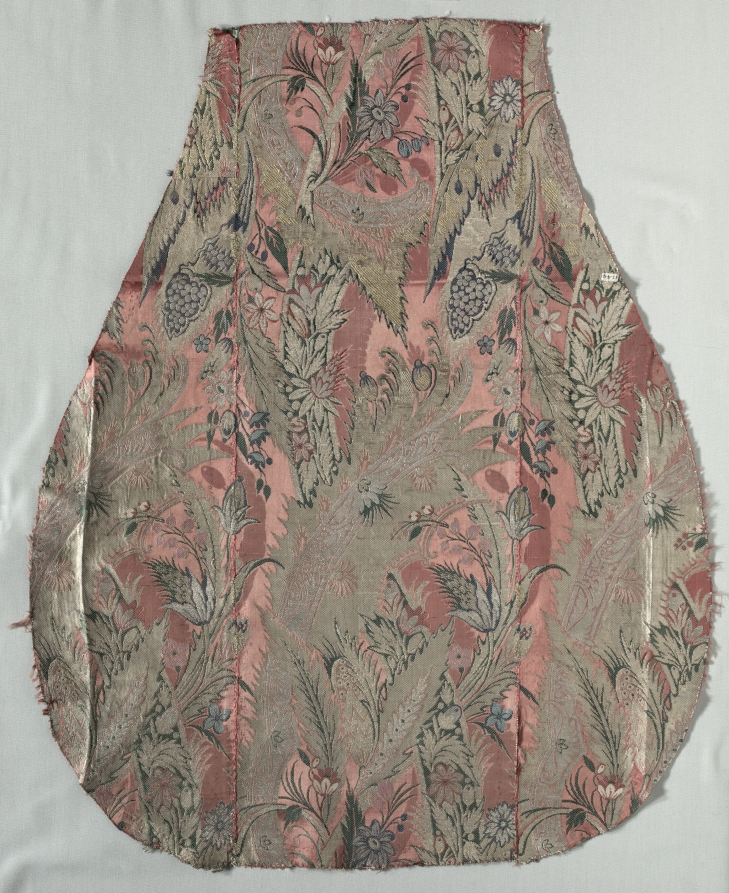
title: Half of a Chasuble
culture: Italy, 17th century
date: 1600s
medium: silk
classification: Textile